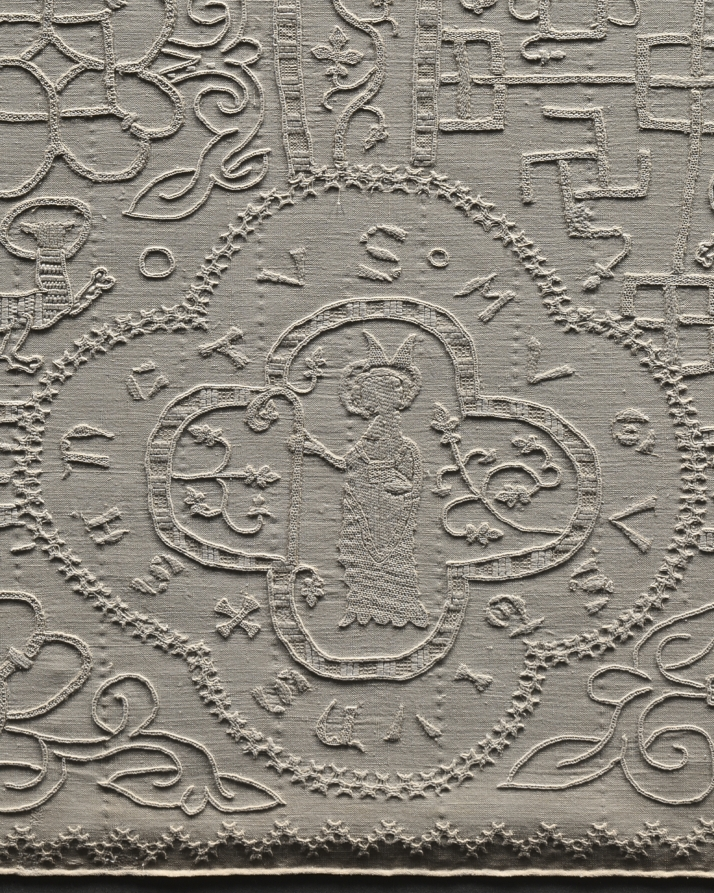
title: Altar Cloth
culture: Germany, Altenberg on the Lahn, Premonstratensian Convent, 14th century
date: c. 1350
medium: embroidery: linen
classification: Embroidery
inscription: various motifs enclosed in quatrefoils with identifying inscriptions in Gothic letters.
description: This large, embroidered altar cloth is one of the rarest, most important medieval church furnishings in existence. It was stitched by nuns in the Premonstratensian Convent in Altenberg on the Lahn River, north of Frankfurt, Germany, and was used to cover the church’s high altar in the weeks leading up to Easter. The cloth is an example of linen embroidery, a specialty of German nuns in the later Middle Ages. The Altenberg monastery church once had valuable furnishings; the high altar retable (a decorated frame with sculptures and paintings on the top of an altar) has survived, the main parts of which are now in the Städel Museum in Frankfurt, Germany.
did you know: When lit from behind, the previously hidden details emerge and the complex design becomes evident.